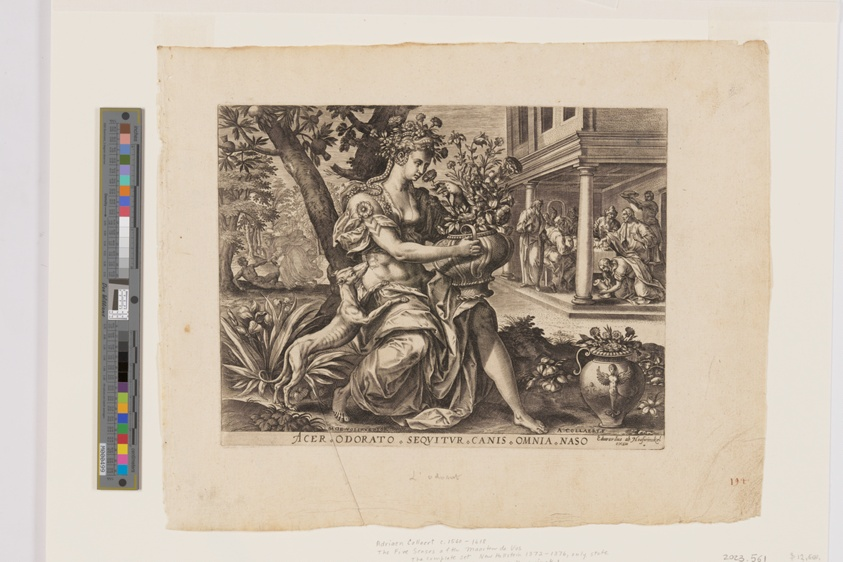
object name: Print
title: Smell, from The Five Senses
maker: Adriaen Collaert (Flemish, c. 1560–1618); after Maarten de Vos (Flemish, 1532–1603)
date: c. 1580-1590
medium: Engraving on ivory laid paper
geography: Flanders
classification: engraving; paper; print; prints and drawing